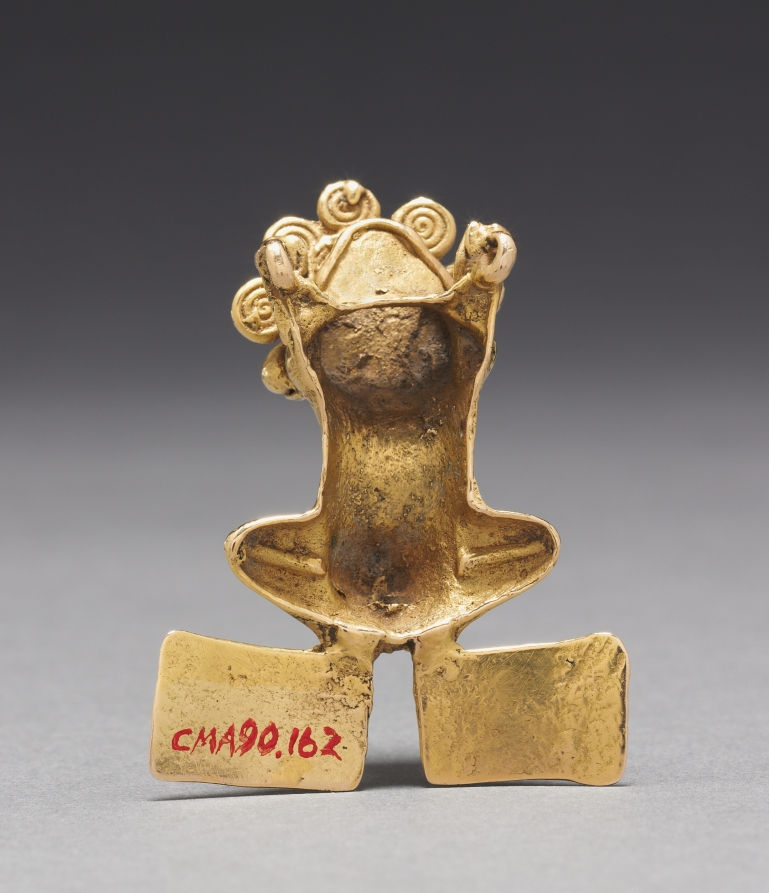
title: Frog Pendant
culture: Western Panama, Veraguas-Gran Chiriquí Style, c. 1000-1550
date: c. 1000–1550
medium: cast and hammered gold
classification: Metalwork